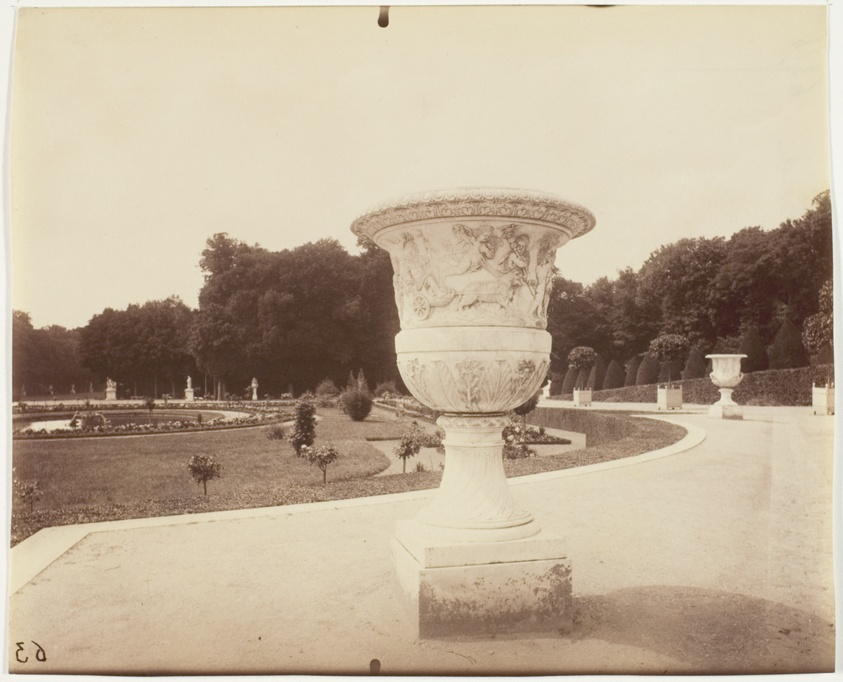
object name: Photograph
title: Versailles, Vase par Cornu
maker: Jean-Eugène-Auguste Atget (French, 1857–1927)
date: 1902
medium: Albumen print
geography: France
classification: albumen silver print; photographic process; photography; photograph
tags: Collected by Hugh Edwards